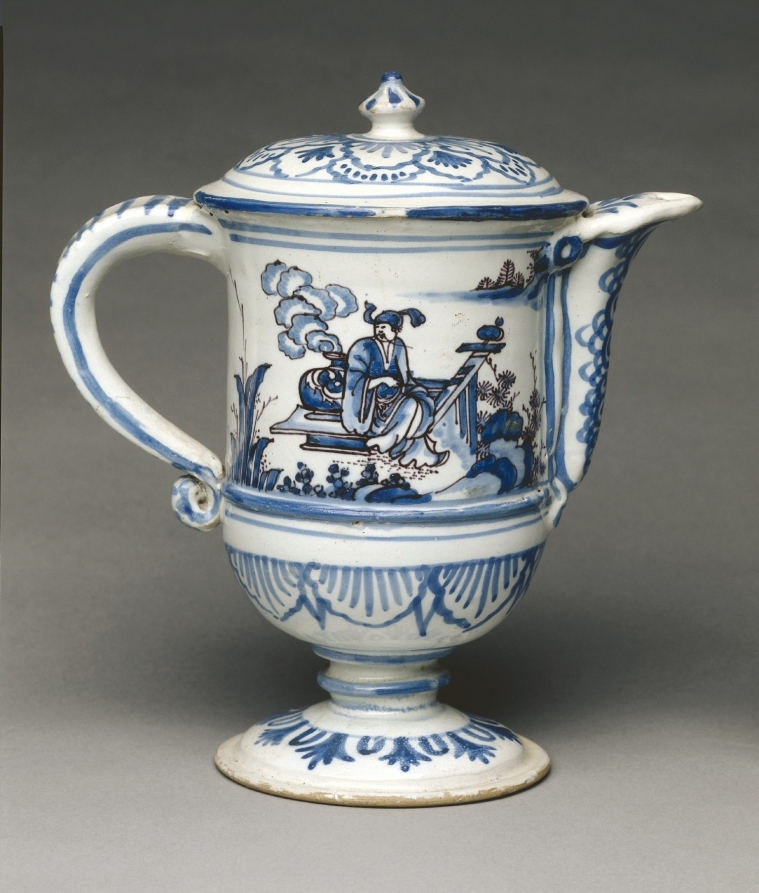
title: Puzzle Pitcher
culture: France, Marseilles, late 17th Century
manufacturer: Saint-Jean-du-Desert Factory (French)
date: late 1600s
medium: faience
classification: Ceramic